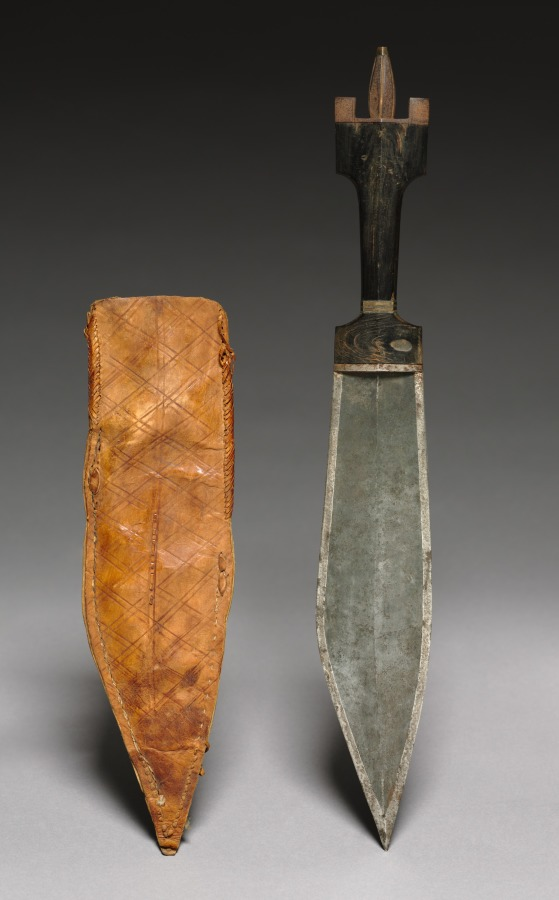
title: Knife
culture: Africa, East Africa, Somalia, unknown maker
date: early 1900s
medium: Iron, rawhide or leather, and horn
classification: Arms and Armor